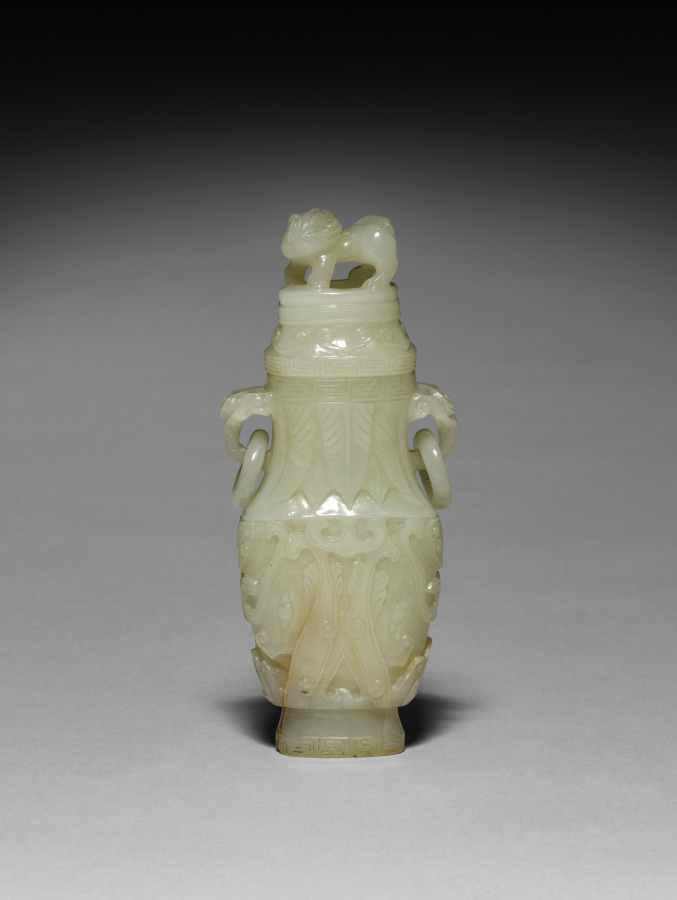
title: Jar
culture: China, Qing dynasty (1644-1911)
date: 1644–1911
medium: jade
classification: Jade